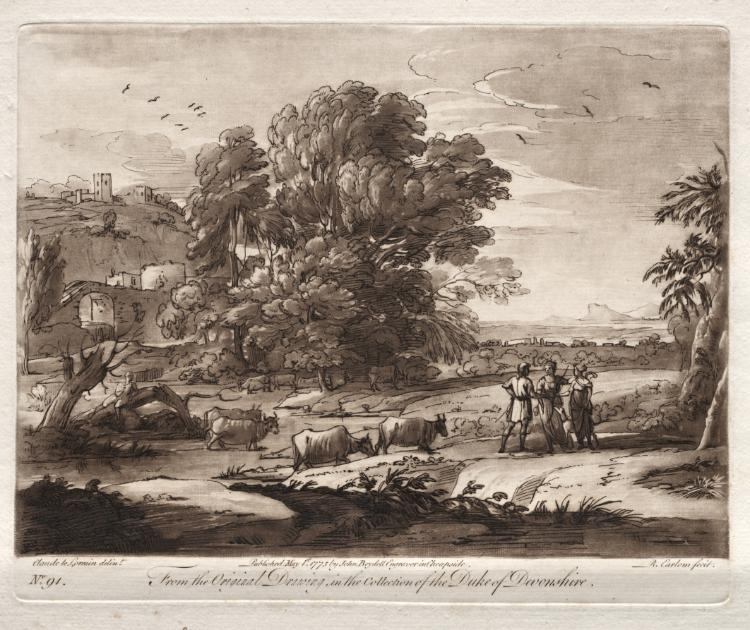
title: Liber Veritatis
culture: England, 18th century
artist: Richard Earlom (British, 1743–1822)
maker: after Claude Lorrain (French, 1604–1682)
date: 1777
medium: etching and mezzotint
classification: Print